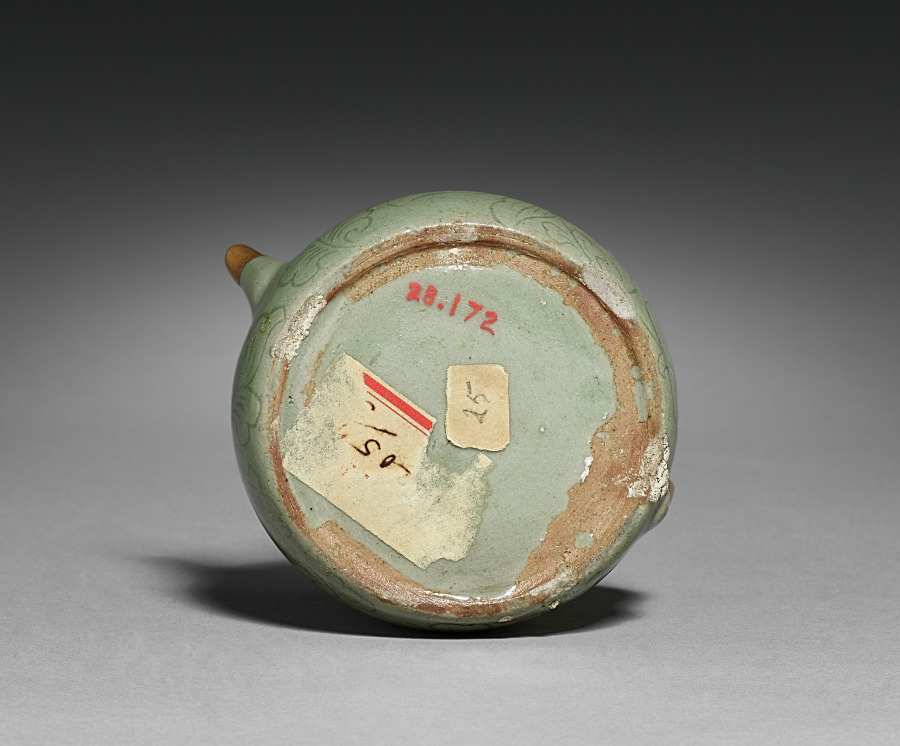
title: Wine Ewer with Incised Scroll Design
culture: Korea, Goryeo dynasty (918–1392)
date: 1100s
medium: celadon with incised and carved design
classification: Ceramic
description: Many celadon ceramics, such as these two miniature pots, have been repaired with gold lacquer. Termed kintsugi (literally meaning “gold joinery”) in Japanese, this restoration method highlights broken parts with glittering gold mixed with lacquer. Initiated in 15th-century Japan, the technique follows a popular aesthetic concept called wabi-sabi, which finds beauty in imperfect things. Goryeo celadons were considered rare treasures among early 20th-century Japanese collectors; thus, their broken condition is brilliantly highlighted in gold lacquer, as seen here in the repaired spouts, handle, and lid.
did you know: Termed kintsugi (literally meaning “gold joinery”) in Japanese, this method of repairing broken parts with glittering gold mixed with lacquer was extensively used for ceramic works in the Goryeo period, such as this one.